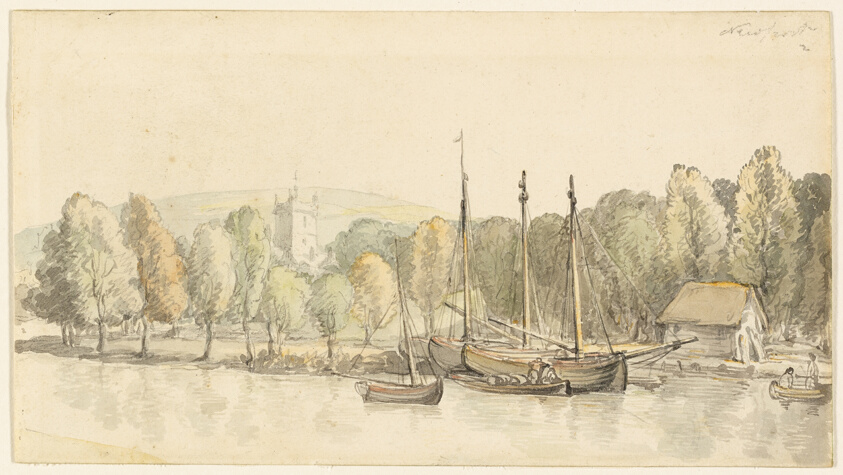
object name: Drawing and Watercolor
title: Newport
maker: Thomas Rowlandson (English, 1756-1827)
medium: Watercolor, over graphite, on ivory wove paper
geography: England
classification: watercolor; drawings (visual works); prints and drawing